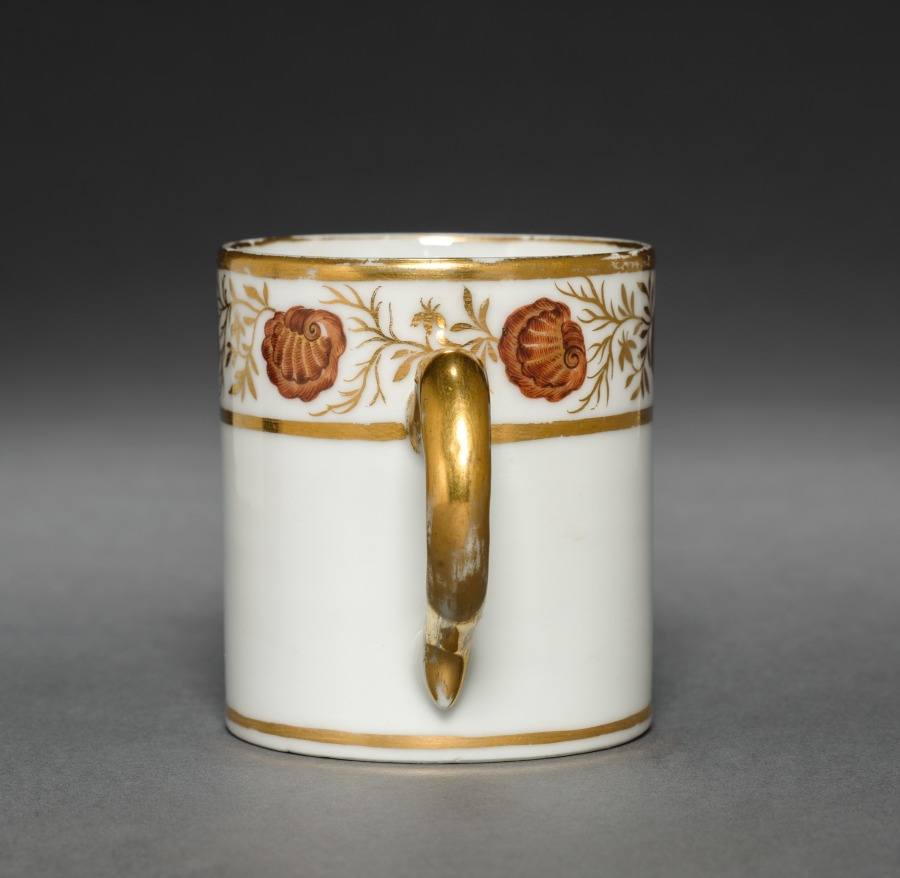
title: Cup from Oliver Wolcott, Jr. Tea Service (2 of 6)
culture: Chinese Export porcelain, late 18th-early 19th century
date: 1785–1805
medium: porcelain, sepia enamel, gold leaf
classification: Ceramic